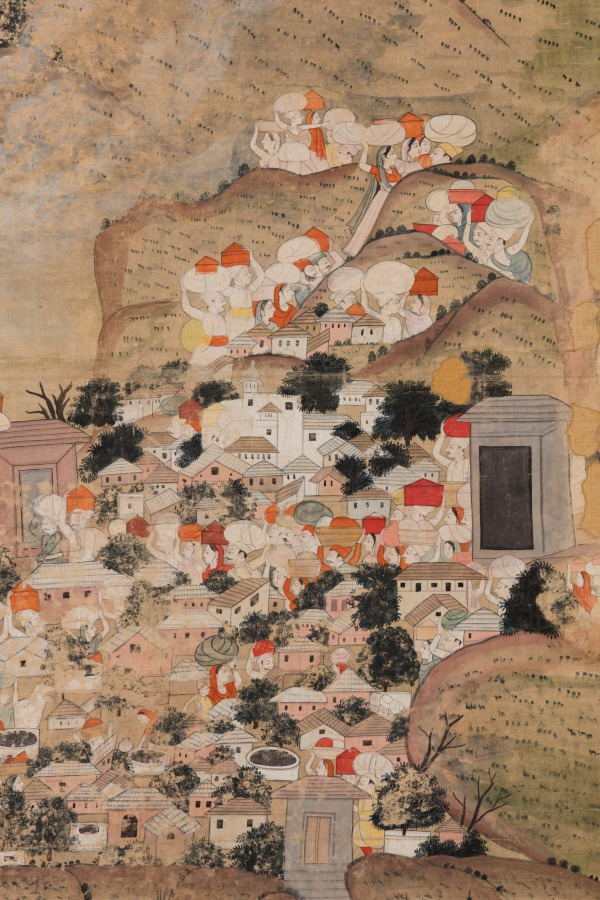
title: Raja Sansar Chand attacking Kangra Fort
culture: Northern India, Pahari kingdom of Kangra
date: after 1782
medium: Gum tempera, ink, and gold on cotton cloth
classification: Painting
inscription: Inscriptions in Takri and Persian. Persian reads: “On the 23rd of the month of Kartik, Samvat 1839 (1782 AD) Sri Maharaja Sansar Chand Bahadur attached Lakkarkot (Nagrakot ?) and the fortress of Kangra, attained victory and made siege intrenchments at the fortress of Kot Kangra.”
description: In 1782, the 17-year-old king of Kangra fought to retake his ancestral kingdom from the Mughals, who had controlled the territory since 1620. He rides a dark brown horse in front of the camel at the far right, blending in among his army and allies. The leftmost panel shows the residents of Kangra fleeing the conflict with their belongings on their heads to the safety of the fortress at the far left, from the walls where cannons are being fired. The main temple, built of gray stone, is in the middle of the composition, marked by red flags.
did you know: The king is 17 years old, beardless, riding a dark brown steed in front of the camel at the far right.